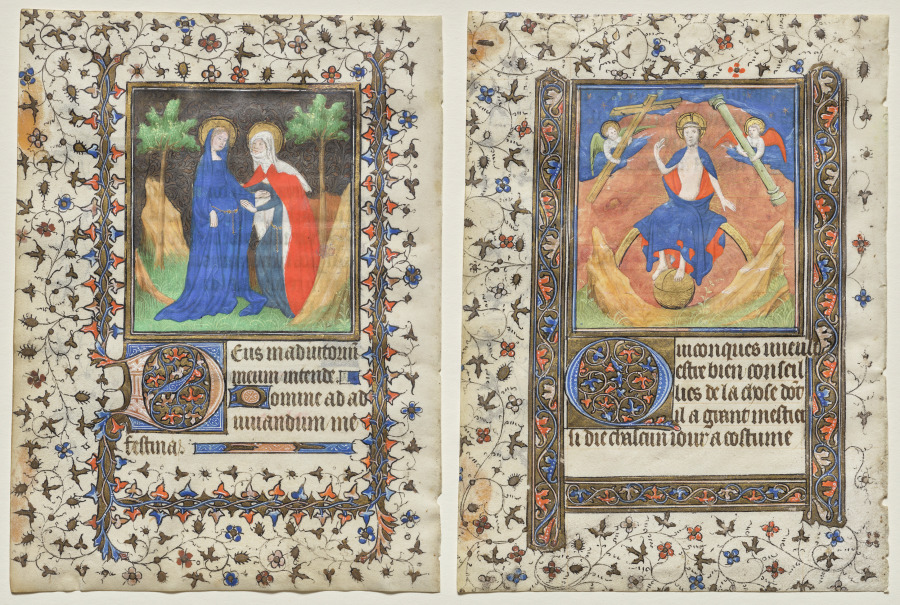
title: Leaves from a Book of Hours: The Visitation and Christ in Judgment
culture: France, Paris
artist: workshop of Boucicaut Master (French, Paris, active about 1410–25)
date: c. 1415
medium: ink, tempera, and gold on vellum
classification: Manuscript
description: The heart of every book of hours is the Hours of the Virgin. With this set of prayers, the reader asked the Virgin Mary to intercede on their behalf. The prayers come mostly from the Bible and include psalms, hymns, and readings. The Hours of the Virgin emerged from the eight “hours” of the day in the monastic world’s routine of daily prayers from daybreak to late at night. Originally used solely by the ordained, by the 1000s, these prayers had spread to the general population through their inclusion in books of hours. This section is traditionally illustrated by images from the life of the Virgin Mary, with each hour featuring a different event. The scene of the Visitation opens lauds, the prayers said at night or upon rising.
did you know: Highly customizable, the order of a book of hours shifts, and individual prayers vary, sometimes significantly, from region to region.